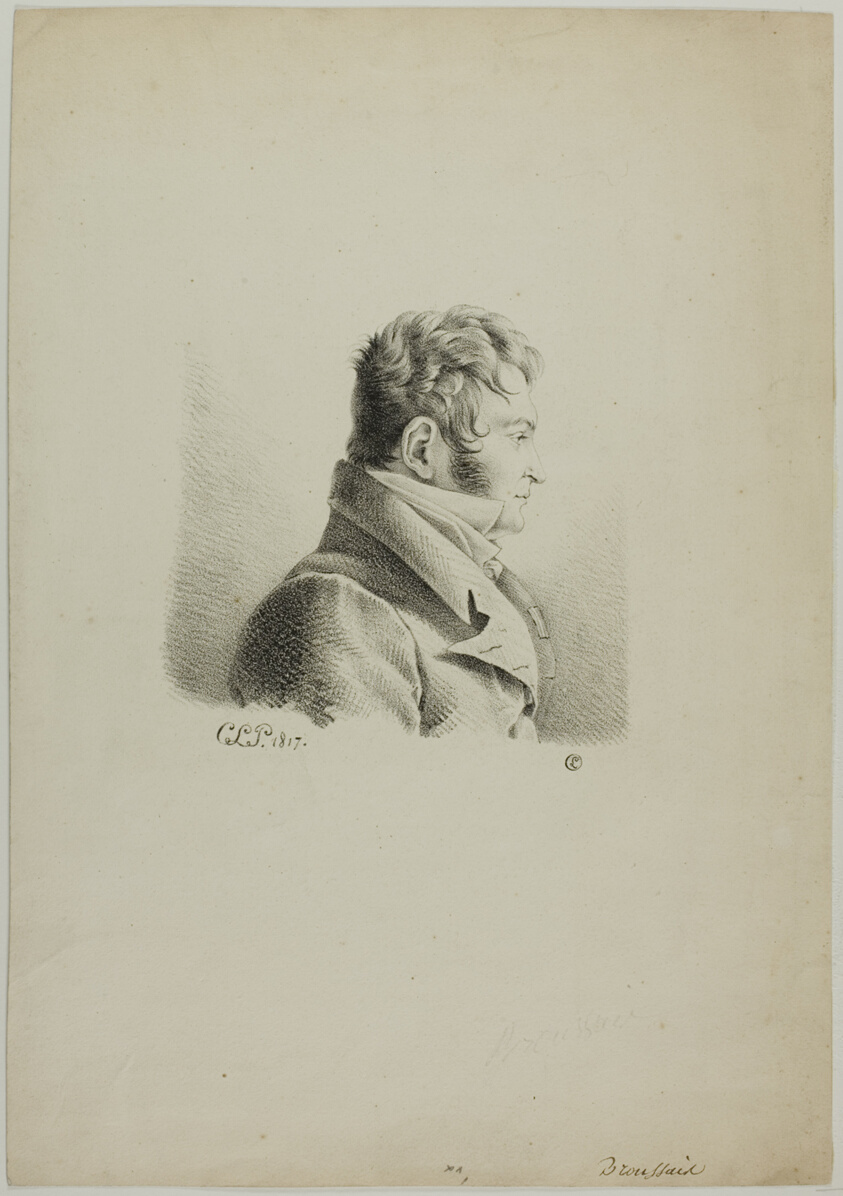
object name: Print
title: Portrait of Dr. Broussais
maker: Giuseppe Maria Crespi (Italian, 1665-1747); printed by Comte de Charles Philibert Lasteyrie du Saillant (French, 1759-1849)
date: 1817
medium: Lithograph in black on cream wove paper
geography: Italy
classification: lithograph; print; prints and drawing